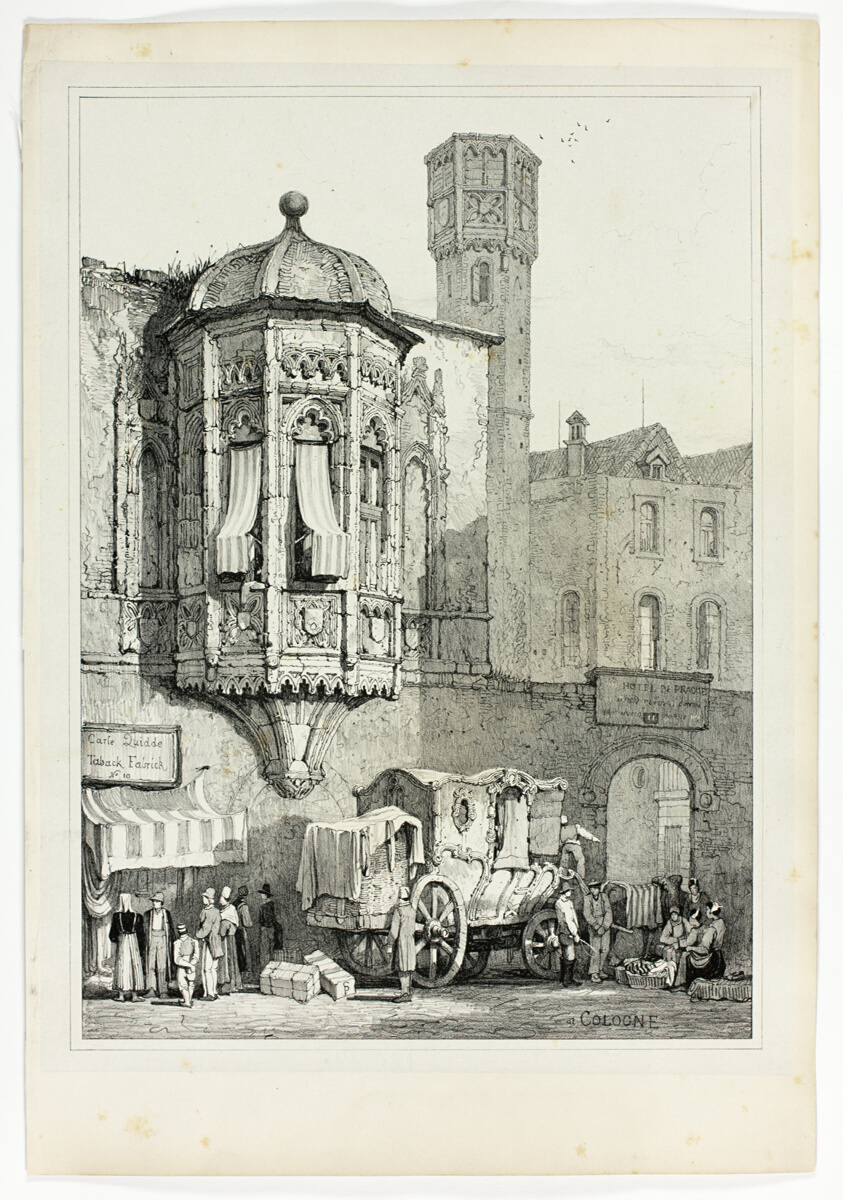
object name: Print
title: At Cologne, from Facsimiles of Sketches made in Flanders and Germany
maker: Samuel Prout (English, 1783-1852); printed by Charles Joseph Hullmandel (English, 1789-1850)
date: 1833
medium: Lithograph in black on grayish-ivory chine, laid down on ivory wove paper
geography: England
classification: lithograph; print; prints and drawing